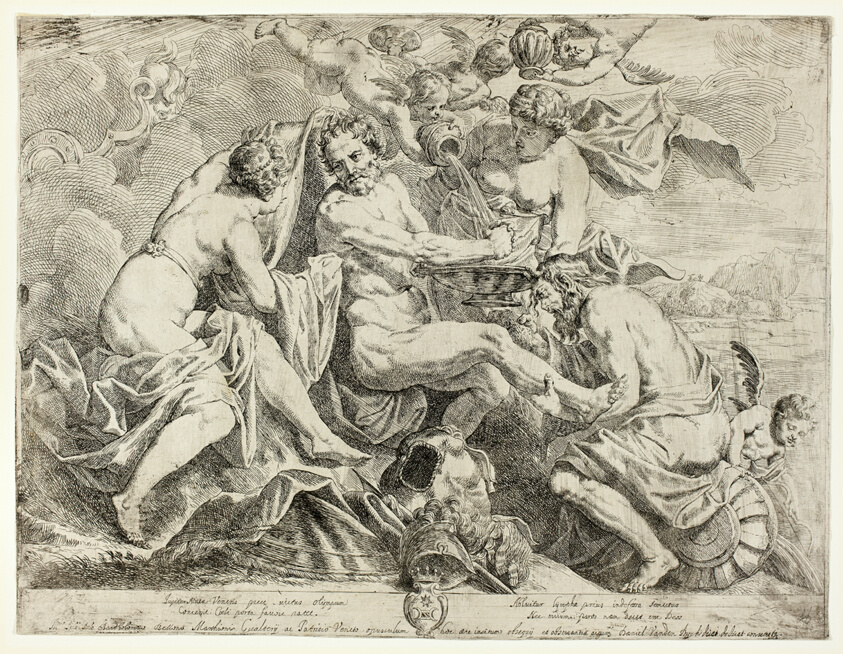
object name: Print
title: The Deification of Aeneas by Nymphs and Cupids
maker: Daniel van den Dyck (Flemish, 1614-1662)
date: c. 1645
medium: Etching in black on ivory laid paper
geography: Flanders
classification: etching; paper; print; prints and drawing